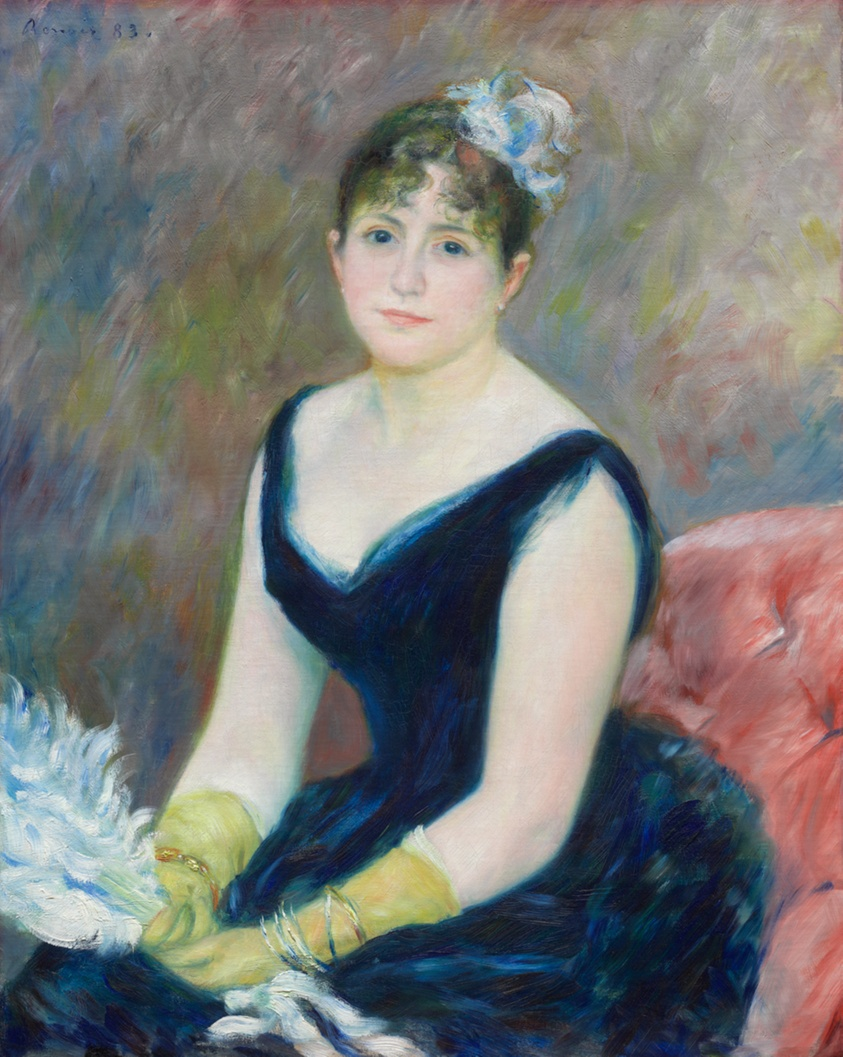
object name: Painting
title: Madame Léon Clapisson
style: Impressionism, nineteenth century, 19th century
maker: Pierre-Auguste Renoir (French, 1841–1919)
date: 1883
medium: Oil on canvas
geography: France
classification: painting; portrait; paint; oil paintings (visual works); oil on canvas; french; european painting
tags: portraits: female subject, white (color), red (color), portrait, feathers, fans, dresses, chair, blue (color), blue, women, portraits, Century of Progress, world's fairs, Chicago World's Fairs